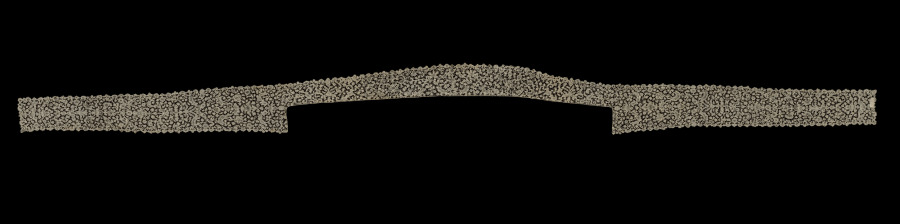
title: Lace Lappets and Edging for Cap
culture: Belgium (Flanders)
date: 1700–1720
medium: Linen: bobbin lace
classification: Lace